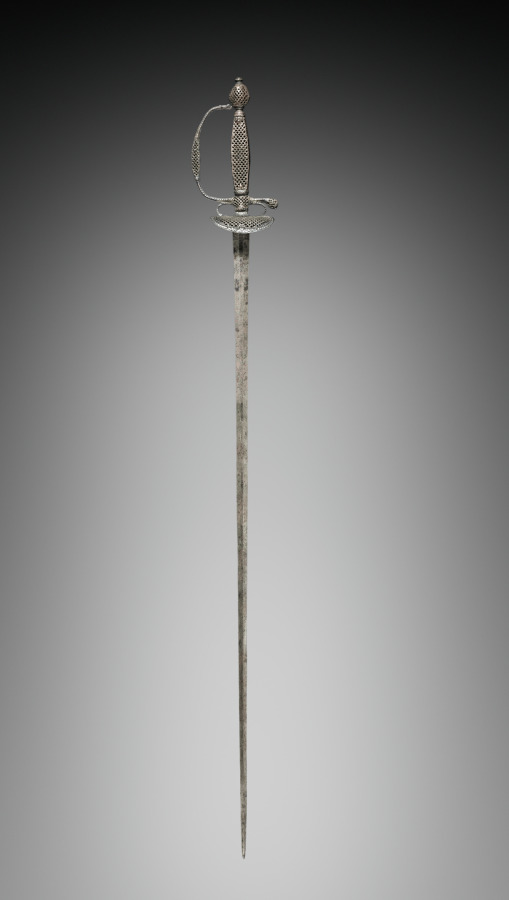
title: Child's Sword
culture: France, Paris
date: c 1780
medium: stainless steel, silver and brass wire inlay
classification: Arms and Armor